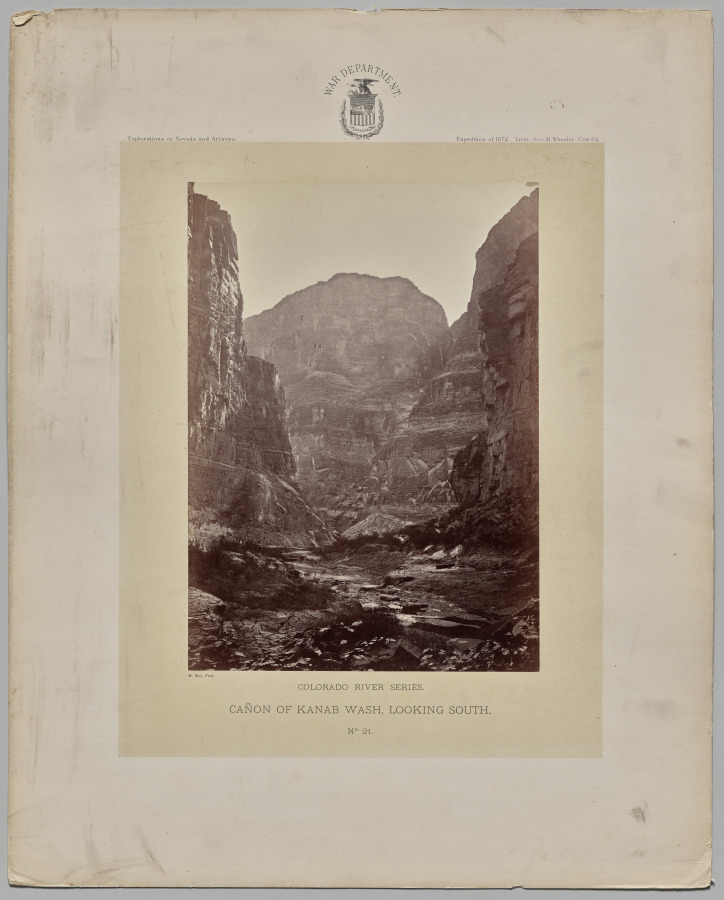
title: Canon of Kanab Wash, Looking South, Colorado River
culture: America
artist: William H. Bell (American, 1830–1910)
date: 1872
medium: Albumen print from glass plate negative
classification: Photograph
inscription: Imprinted in black ink on recto, middle center: "WAR DEPARTMENT (seal of eagle and laurels)"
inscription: Imprinted in black ink on recto, top margin: "Explorations in Nevada and Arizona"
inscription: Imprinted in black ink on recto, top margin: "Expedition of 1872 Lieut. Geo. M. Wheeler, Com'd'g."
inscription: Imprinted in image: "W. Bell, Phot"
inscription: Imprinted on recto, center: "COLORADO RIVER SERIES./CAÑON OF KANAB WASH, LOOKING SOUTH./No. 21."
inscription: Stamped in red ink on verso: "8399-37 (written in pencil)"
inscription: Stamped in black ink on verso: "GEORGE EASTMAN HOUSE/Redundant/Removed date: 2/11/03 JR (in pencil)"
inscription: Written in pencil on verso: "Acc 8399-37/x 80: 151:15"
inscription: Written in pencil on verso: "B 435 A"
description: William H. Bell was the staff photographer for the government-sponsored Wheeler expedition of 1871–73, whose mission was to survey and produce topographic maps of the Southwestern United States. In 1872, he recorded rivers, canyons, and landscapes in Arizona and Utah including Kanab Creek canyon in the Grand Canyon. For a westward view of the same location, see Bell’s Grand Cañon, Colorado River, Mouth of Kanab Wash, Looking West (1997.130).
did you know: Kanab is an anglicization of the Southern Paiute word for “willow.”